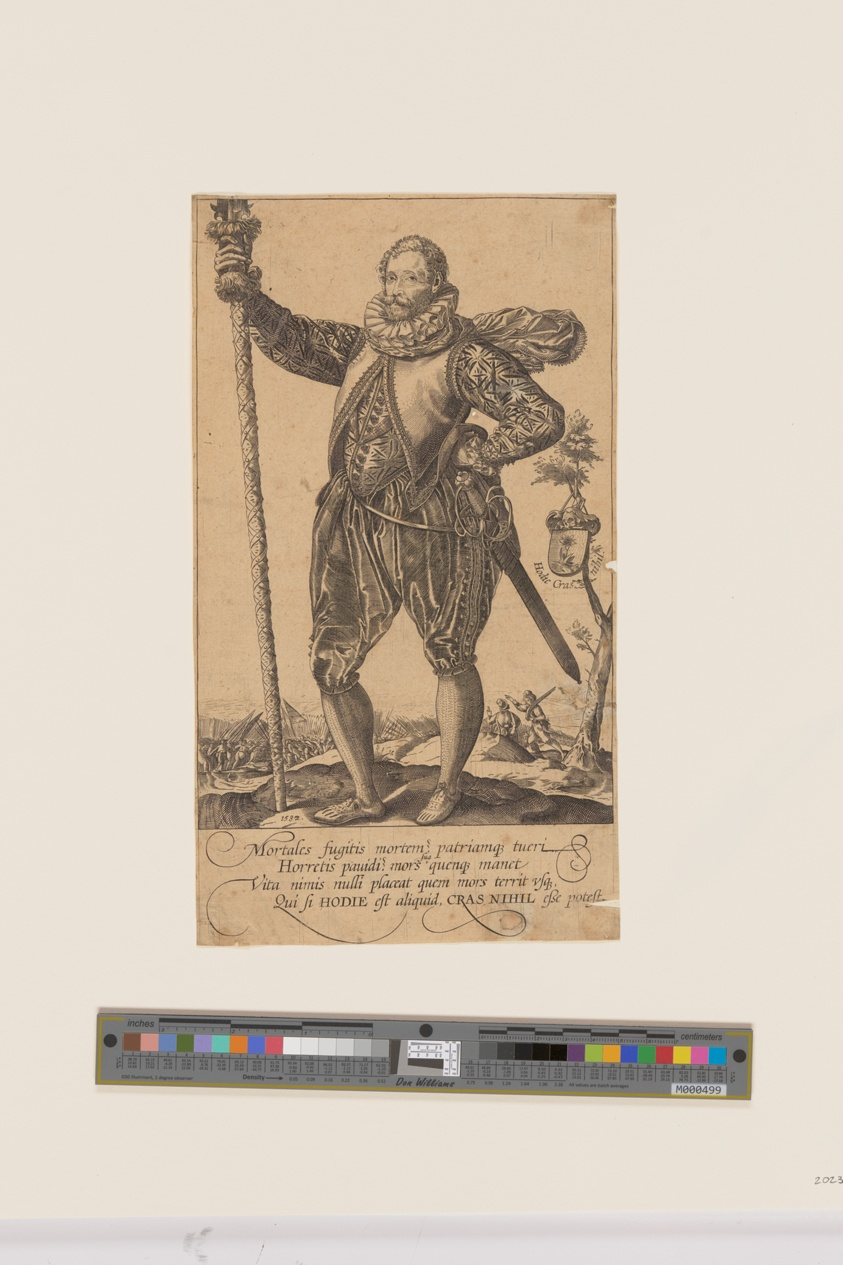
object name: Print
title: A Pike-Man Turned to Left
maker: After Hendrick Goltzius; Dutch, 1558–1617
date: 1587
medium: Engraving on cream laid paper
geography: Netherlands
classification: engraving; paper; print; prints and drawing